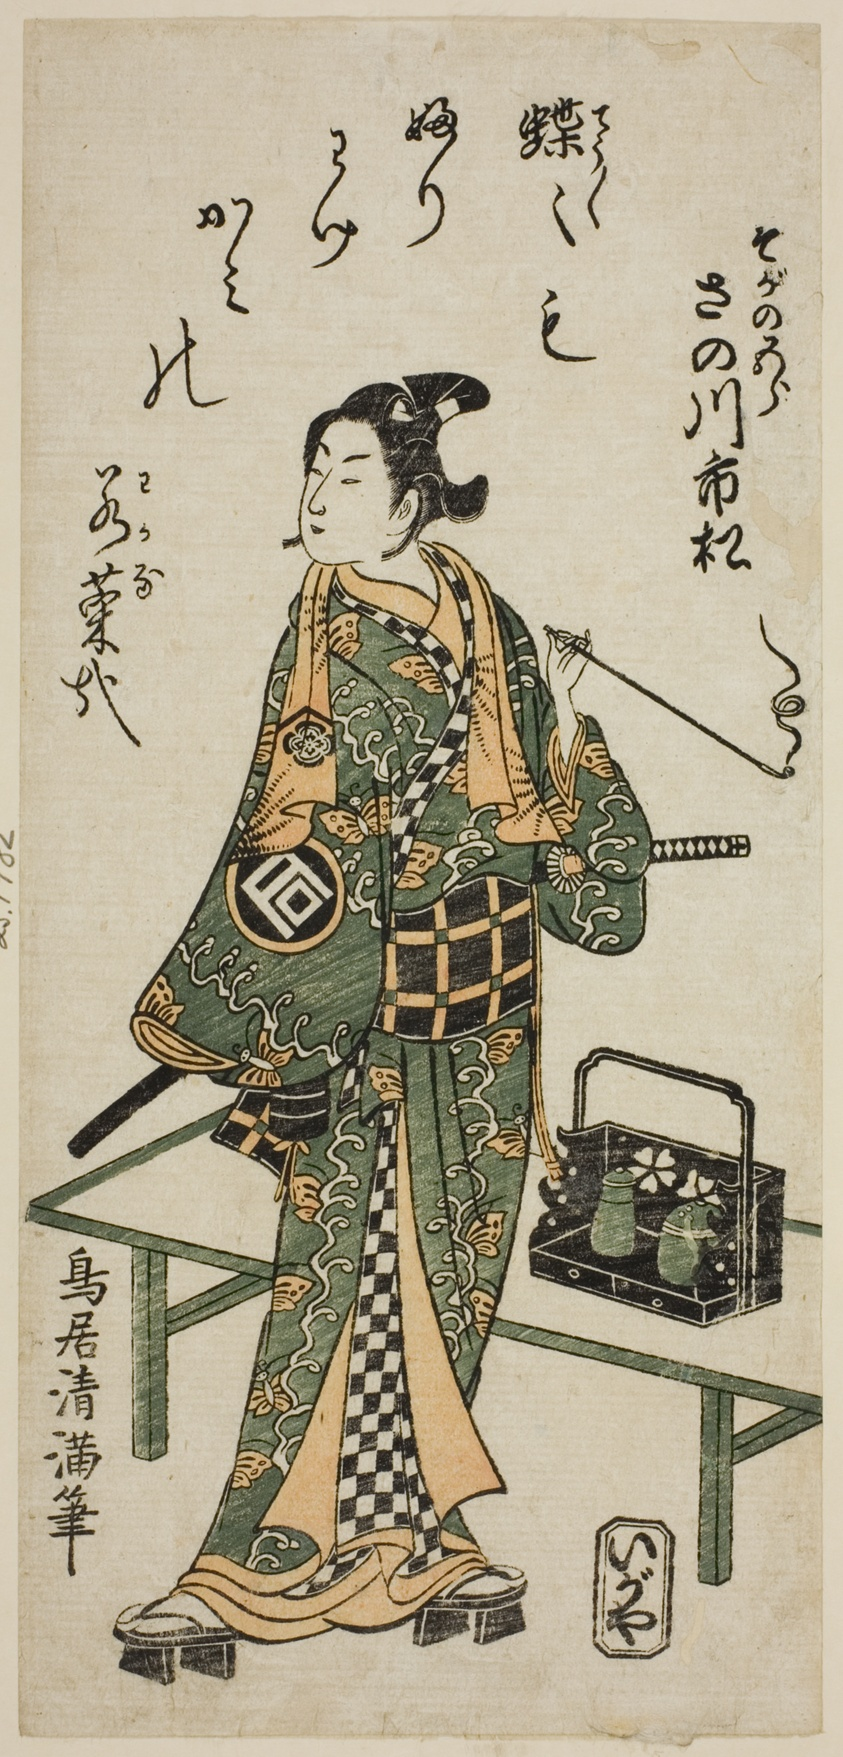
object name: Print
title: The Actor Sanogawa Ichimatsu I as Soga no Goro in the play "Hatachiyama Horai Soga," performed at the Ichimura Theater in the first month, 1759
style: Japanese (culture or style)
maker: Torii Kiyomitsu I (Japanese, 1735–1785)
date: 1759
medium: Color woodblock print; hosoban, benizuri-e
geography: Japan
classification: woodblock print; print; asian art